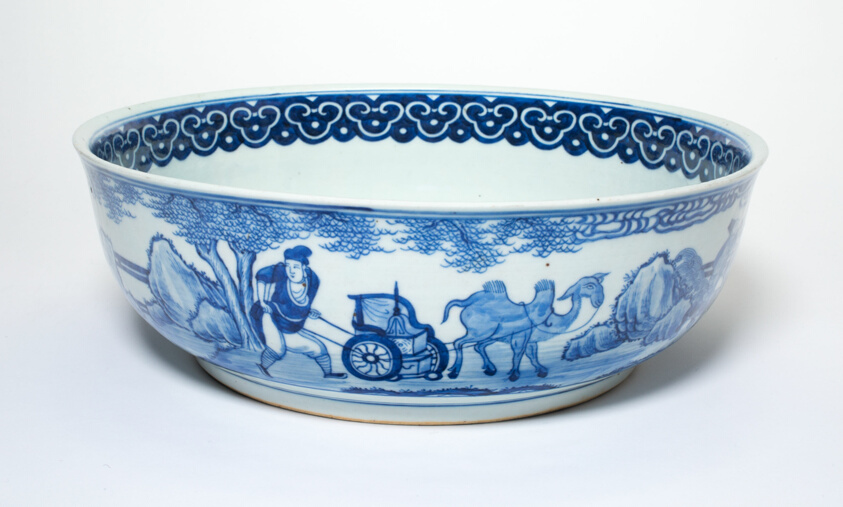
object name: Vessel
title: Bowl with Figures in Landscape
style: Chinese (culture or style)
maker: China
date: Qing dynasty (1644–1911), 19th century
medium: Porcelain painted in underglaze blue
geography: China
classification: bowl; porcelain; dish (vessel); asian art; ceramics; vessel